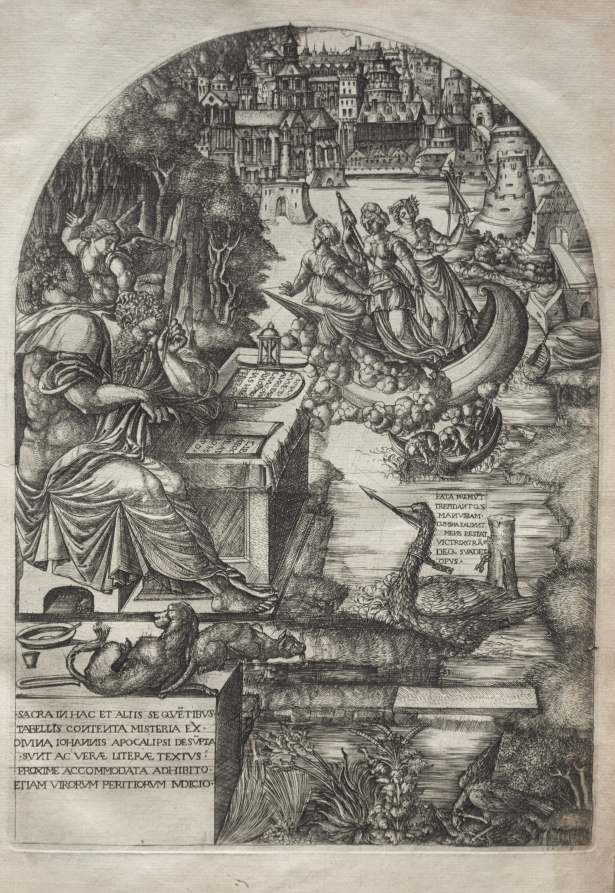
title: The Apocalypse: Duvet Studying the Apocalypse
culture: France, 16th century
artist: Jean Duvet (French, 1485–1561)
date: 1555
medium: engraving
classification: Print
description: This print is part of a bound volume of works illustrating the a narrative of the Apocalypse, taken from the Revelation of Saint John in the Bible. The 23 engravings in the series occupied the artist for a number of years and represent his greatest artistic achievement. The museum's volume is one of only seven known complete sets. Jean Duvet was one of the first major printmakers in France and one of the most original artists of the 1500s. Although he worked mostly in the provincial city of Langres, he became aware of Italian art through the circulation of prints—notably those of Marcantonio Raimondi. His solidly modeled human figures reflect the influence of the Italian High Renaissance. Duvet, however, developed an idiosyncratic, highly artificial style with crowded compositions that ignore rational space in favor of ornamental surface patterns.